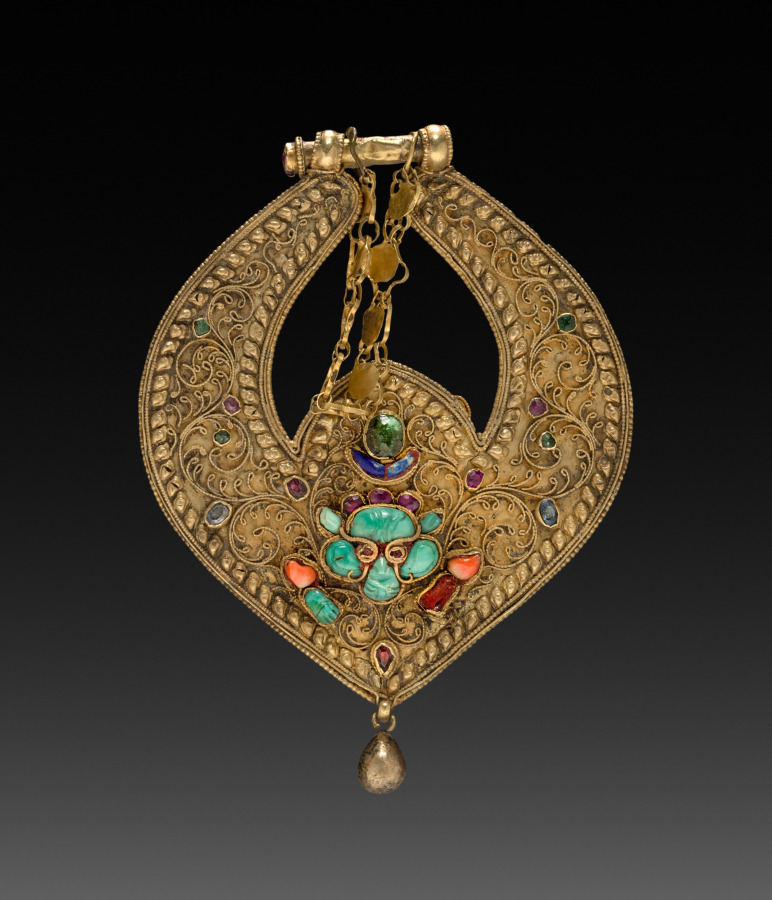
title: Deity Earring with Vishnu on Garuda (front) and chepu (monster mask) (back)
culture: Nepal, Kathmandu Valley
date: 1600s or 1700s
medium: Gold set with precious and semi-precious stones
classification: Jewelry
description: A green Vishnu with four arms, each holding his attributes of discus (his upper right hand), mace (upper left), lotus (lower right), and conch (in pearl, lower left) rides on a coral Garuda with lapis wings, arms outstretched. The blue figures on either side are probably celestial beings praising him in dance postures, with one leg crossed over the other. On the back side, delicate filigree floral scrolls form the backdrop of a protective mask popular in Nepal; a sun over a crescent moon are inlaid above his head.